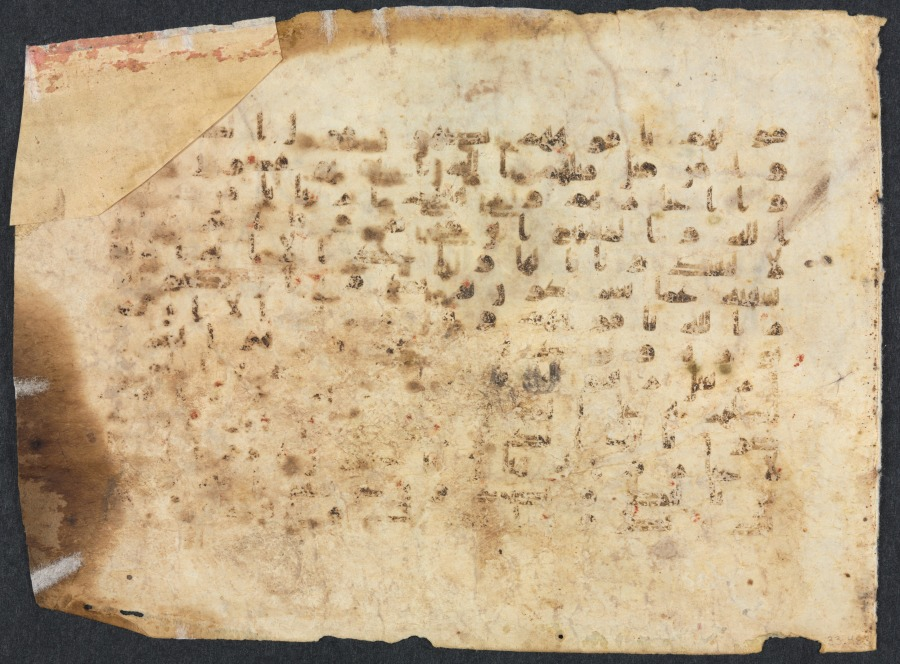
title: Qur'an Manuscript Folio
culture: Egypt?, Abbasid Period, 9th century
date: 800s-900s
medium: ink, gold, and color on parchment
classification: Calligraphy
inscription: Sura Al-Tawba 9: part 33 - part 37. Kufi Script (fourteen lines to a page)